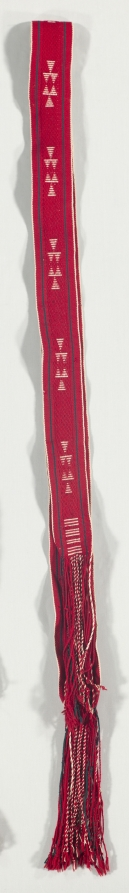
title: "Navajo Style" Belt/Sash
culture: America, Native North American, Southwest, Navajo, Post-Contact, Early Period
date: c 1890–1917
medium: warp face plain weave with supplementary warp float; cotton and wool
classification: Textile